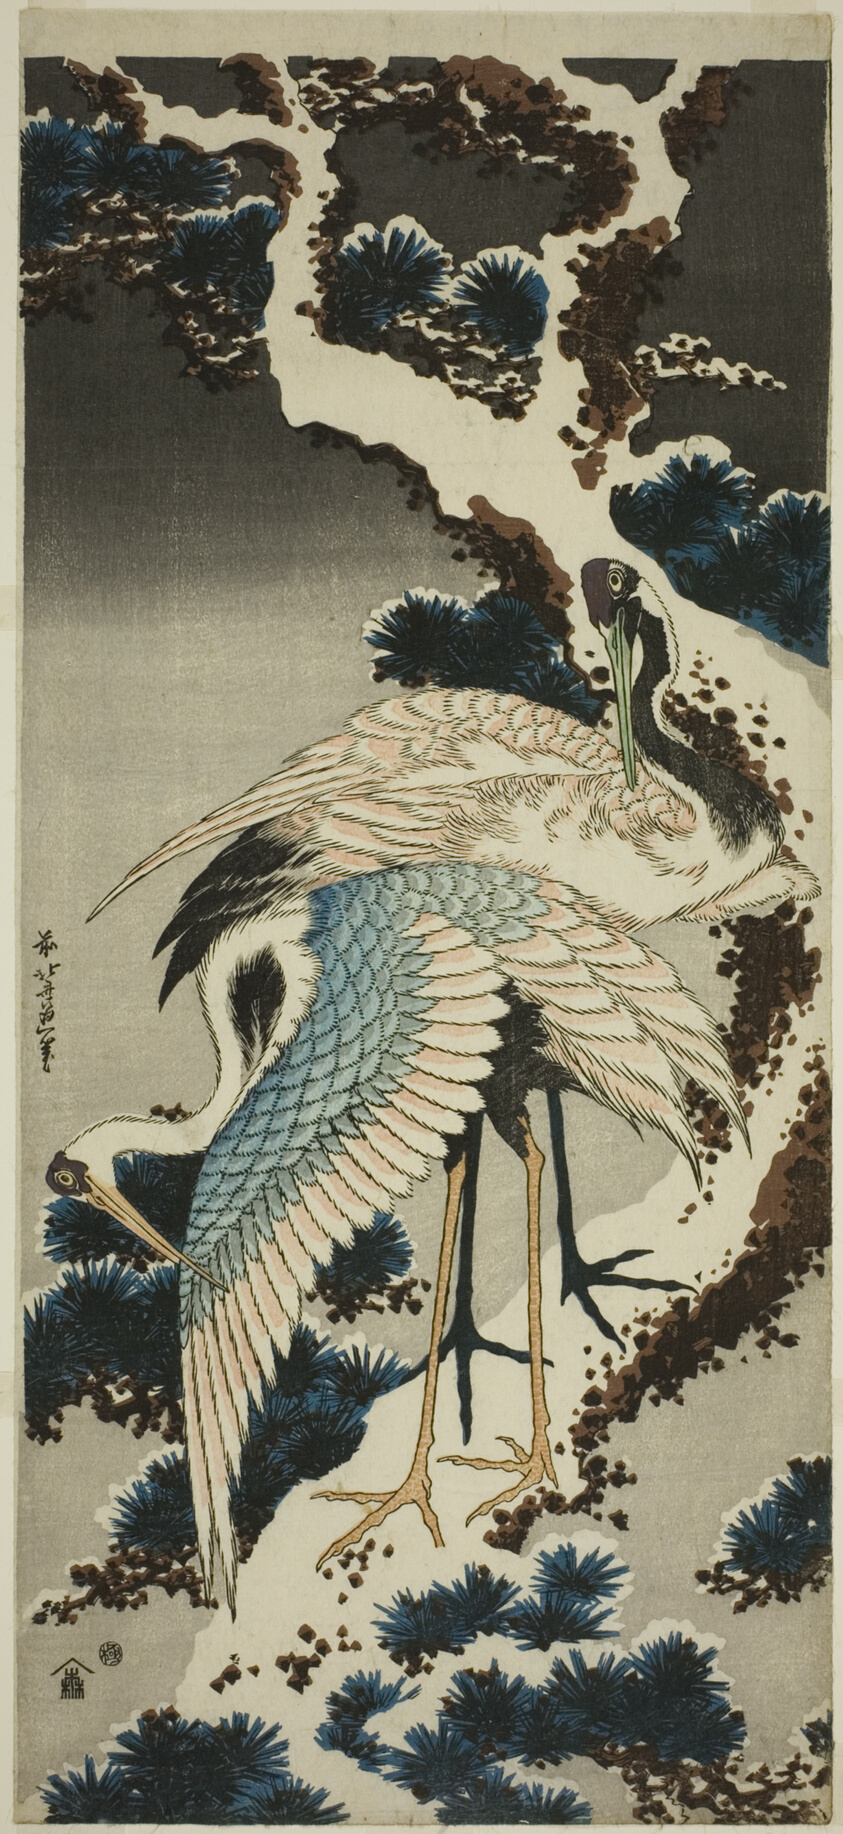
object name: Print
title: Cranes on snow-covered pine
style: Japanese (culture or style)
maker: Katsushika Hokusai 葛飾 北斎; Japanese, 1760-1849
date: c. 1834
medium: Color woodblock print; vertical nagaban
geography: Japan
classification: woodblock print; print; asian art